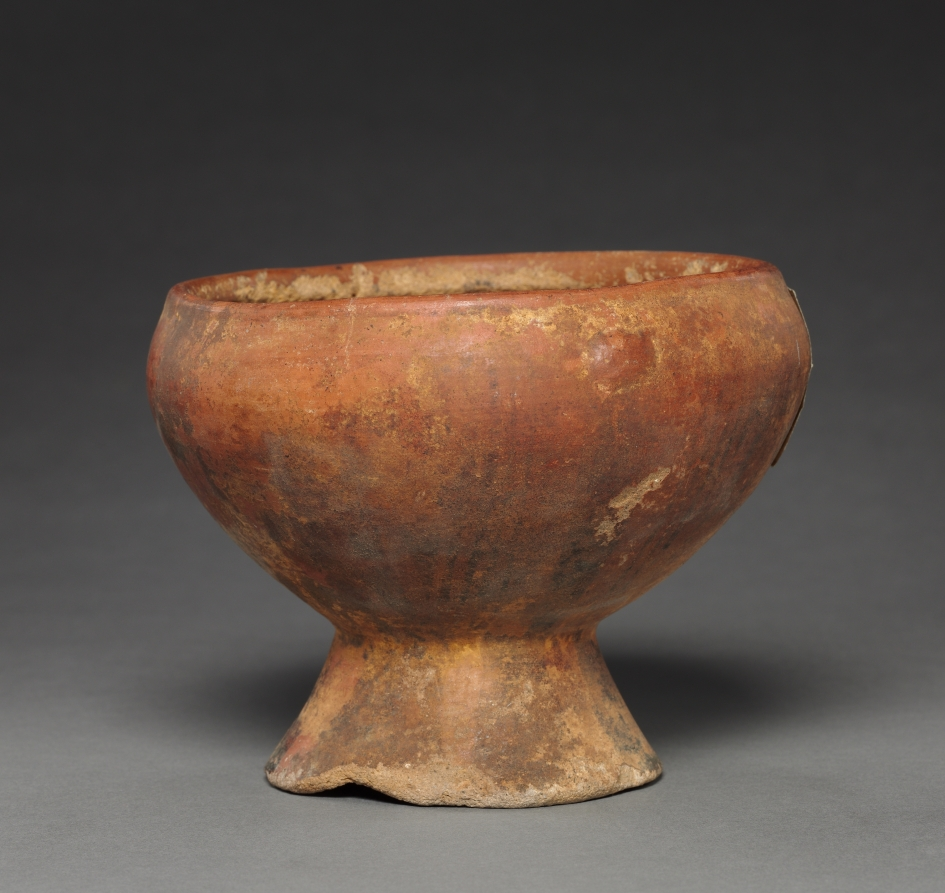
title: Vase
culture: Colombia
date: before 1550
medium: red ware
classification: Ceramic